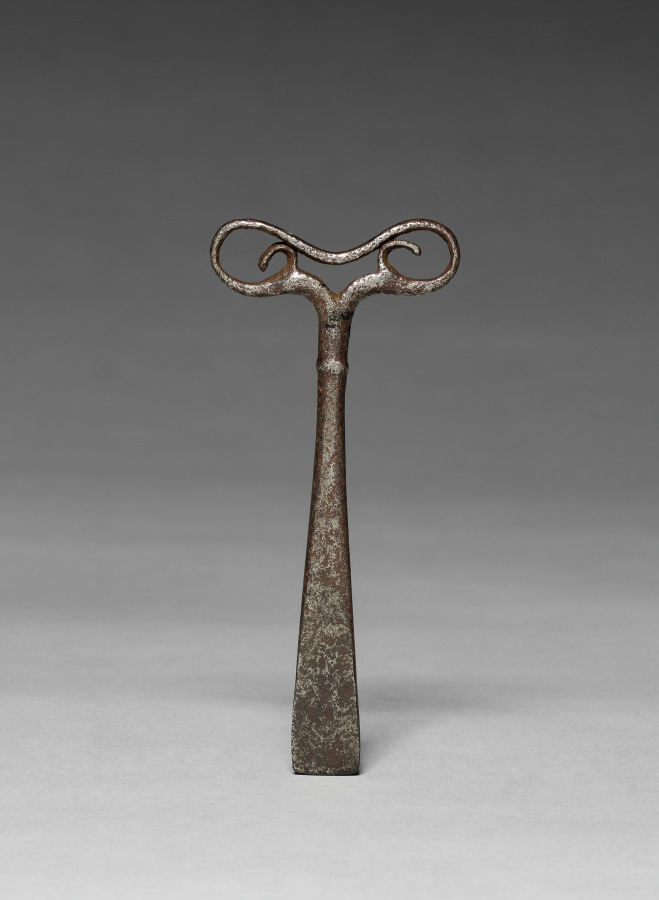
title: Screw Driver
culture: Europe, 16th-17th century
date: 1500s–1600s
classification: Tool